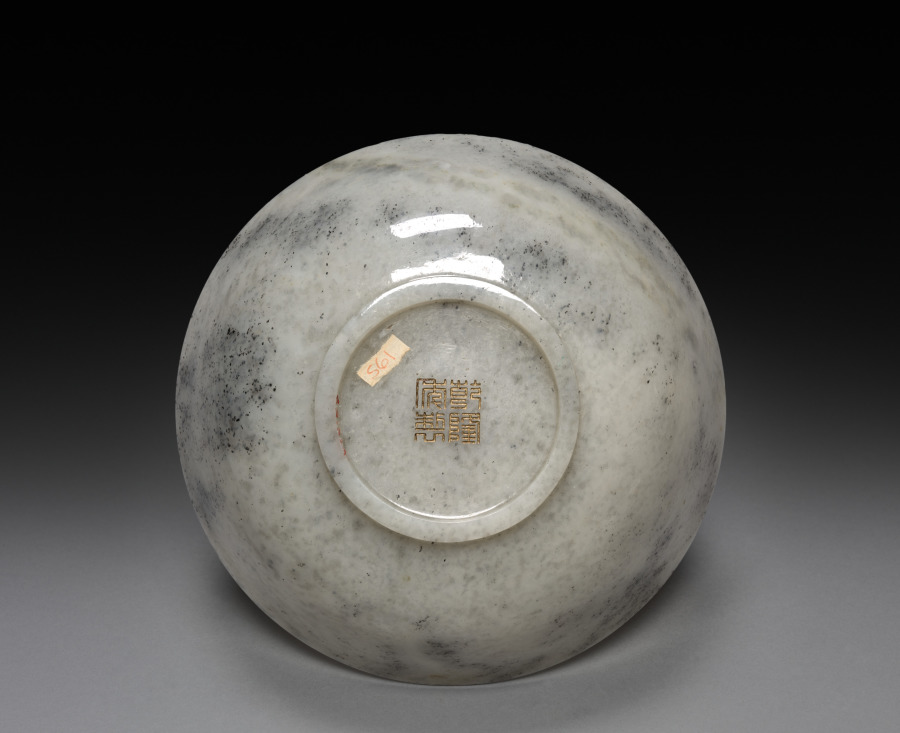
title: Bowl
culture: China, Qing dynasty (1644-1911), Qianlong mark and reign (1736-95)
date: 1736–95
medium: jade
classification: Jade